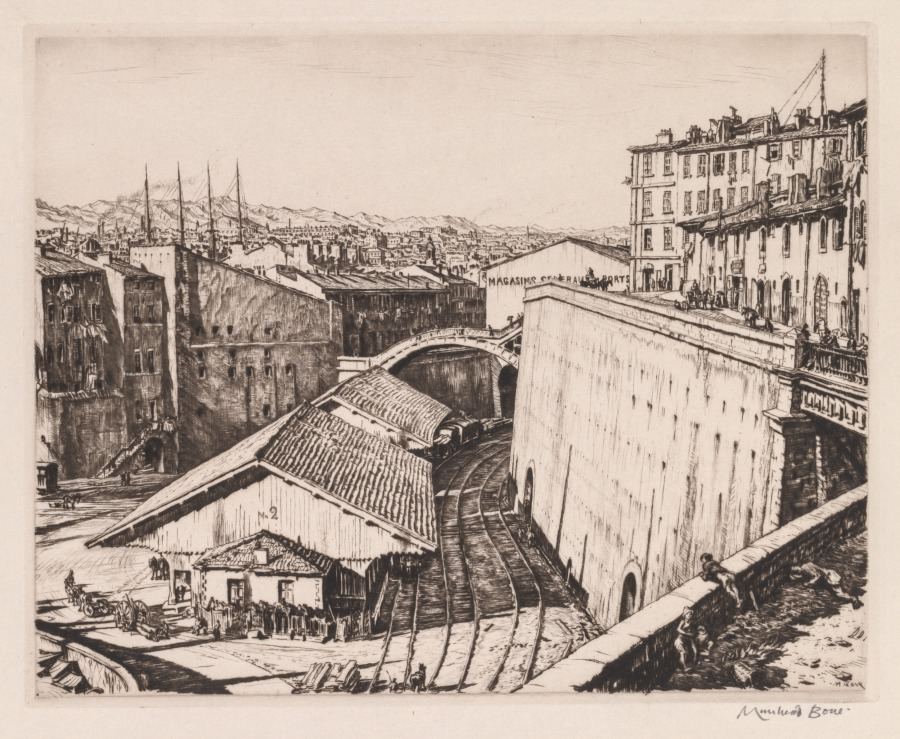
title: Railway Sheds, Marseilles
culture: Britain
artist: Muirhead Bone (British, 1876–1953)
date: 1937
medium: Drypoint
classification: Print